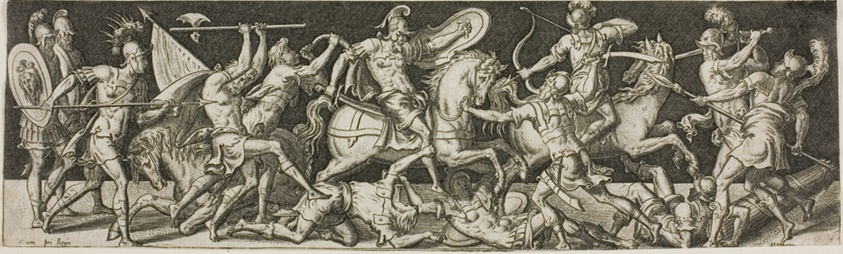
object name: Print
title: Cavalry and Footsoldiers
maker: Etienne Delaune; French, c. 1519-1583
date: 1550/1572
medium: Engraving on paper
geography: France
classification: etching; print; prints and drawing